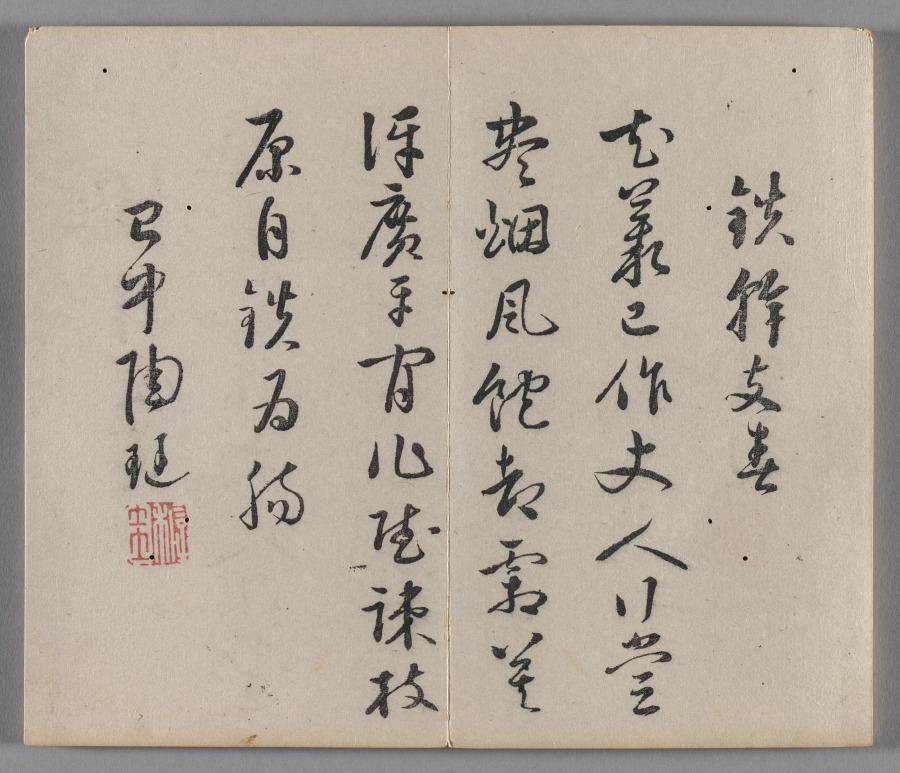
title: Ten Bamboo Studio Painting and Calligraphy Handbook (Shizhuzhai shuhua pu): Plum Blossoms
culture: China, Qing dynasty (1644-1911)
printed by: Hu Zhengyan (Chinese, c. 1584–1674)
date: 1633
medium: Woodblock-printed book; ink and colors on paper; first edition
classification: Print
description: Color printing reached a level of perfection in the early 1600s, as seen in this Ten Bamboo Studio Collection of Calligraphy and Painting and the Mustard Seed Garden Manual of Painting (printed 1679 and 1701). The painterly quality, precision in registering (aligning) the woodblocks, and harmonious colors made them the most successful color print editions in Chinese history. Both editions were printed and compiled in Nanjing, spread nationwide, and had a great impact on the arts in Japan and Korea.